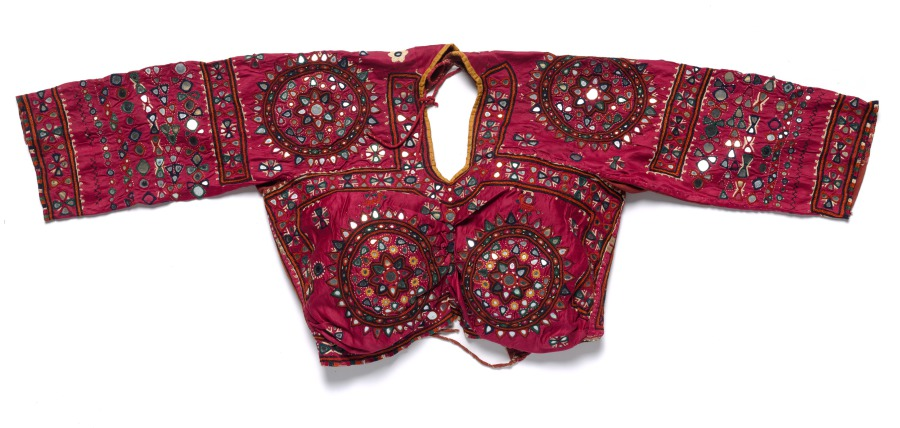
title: Bodice or Choli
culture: Western India, Gujarat, Kachchh or Pakistan, Sindh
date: 1800s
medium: silk on silk satin with mirror-glass inserts, embroidery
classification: Embroidery